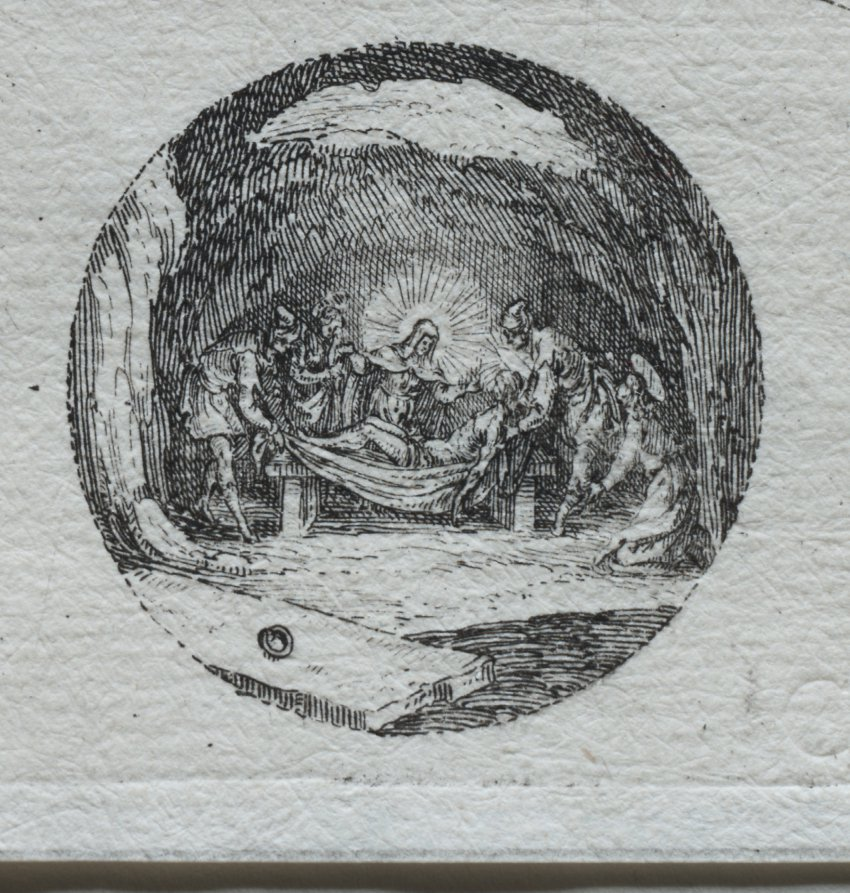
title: The Mysteries of the Passion: The Entombment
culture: France, 17th century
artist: Jacques Callot (French, 1592–1635)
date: 1631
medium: etching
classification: Print